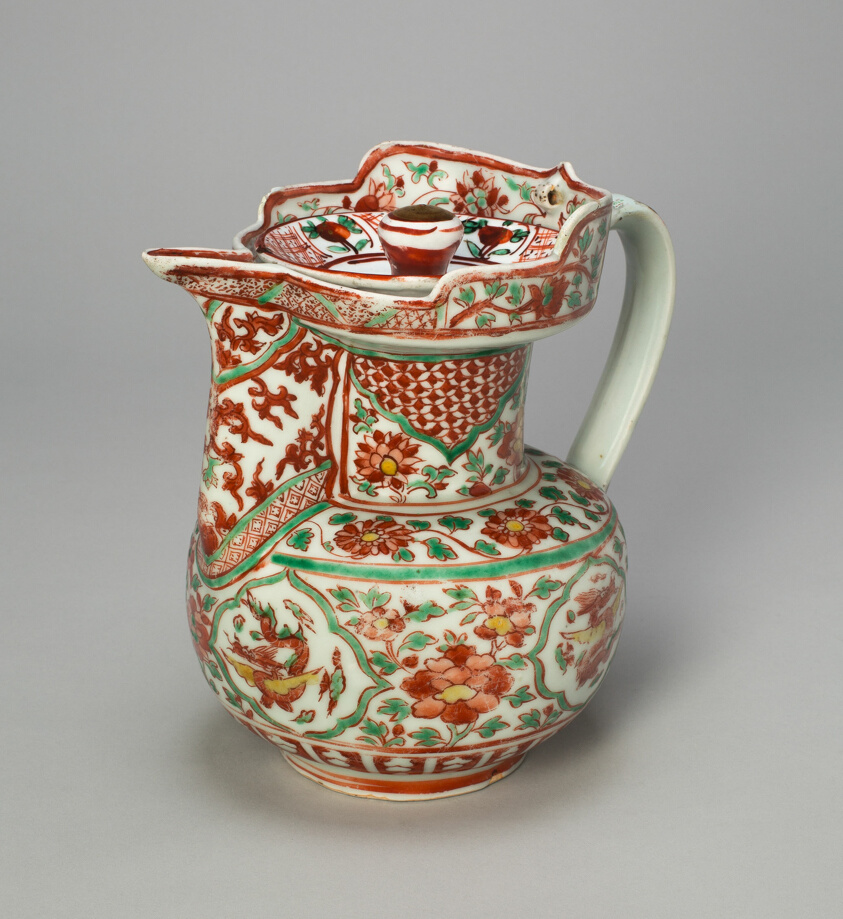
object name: Vessel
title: Covered Ewer with Dragons and Peonies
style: Chinese (culture or style)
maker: China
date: Ming dynasty (1368–1644), 16th century, overglaze painting added later; with Japanese lid bearing seal of Eiraku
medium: Porcelain painted in oeverglaze enamels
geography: China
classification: ewer (vessel); vessel; porcelain; ceramics; asian art